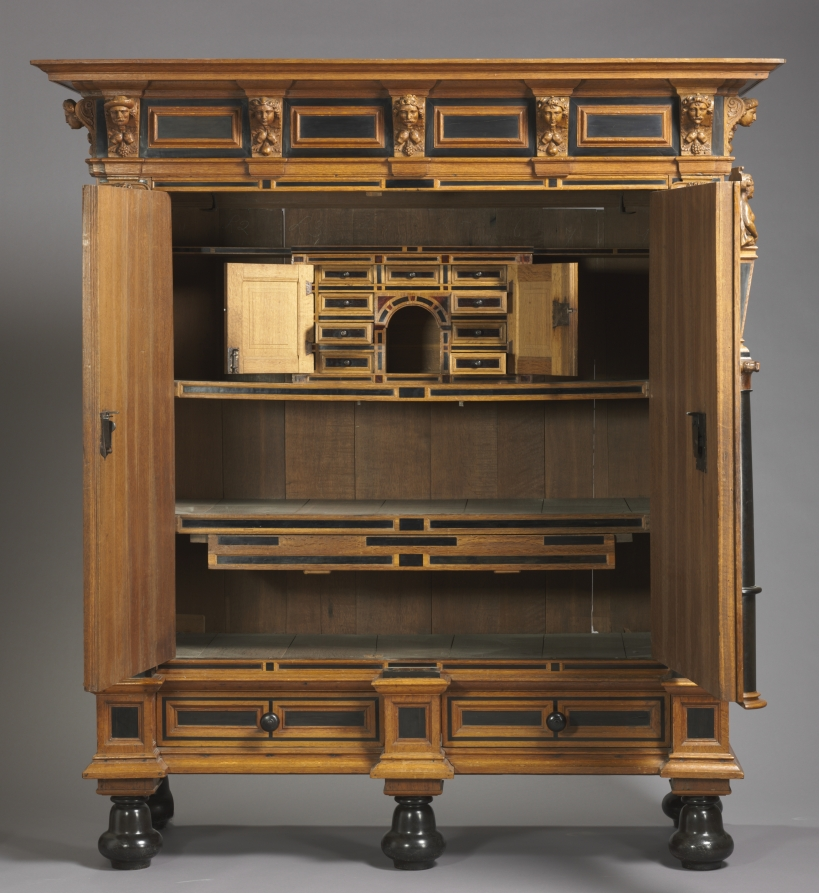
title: Wardrobe (Kast)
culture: Netherlands, Holland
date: c. 1625–50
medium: oak with ebony and rosewood veneers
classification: Furniture and woodwork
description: After the founding of the Dutch East India Company in 1602, the use of exotic, imported wood veneers in furniture became more prevalent. So too did the use of perspective and mathematical systems in laying out the veneers. The combination produced a style of decoration that spread across Europe and even to the young colonies in America.